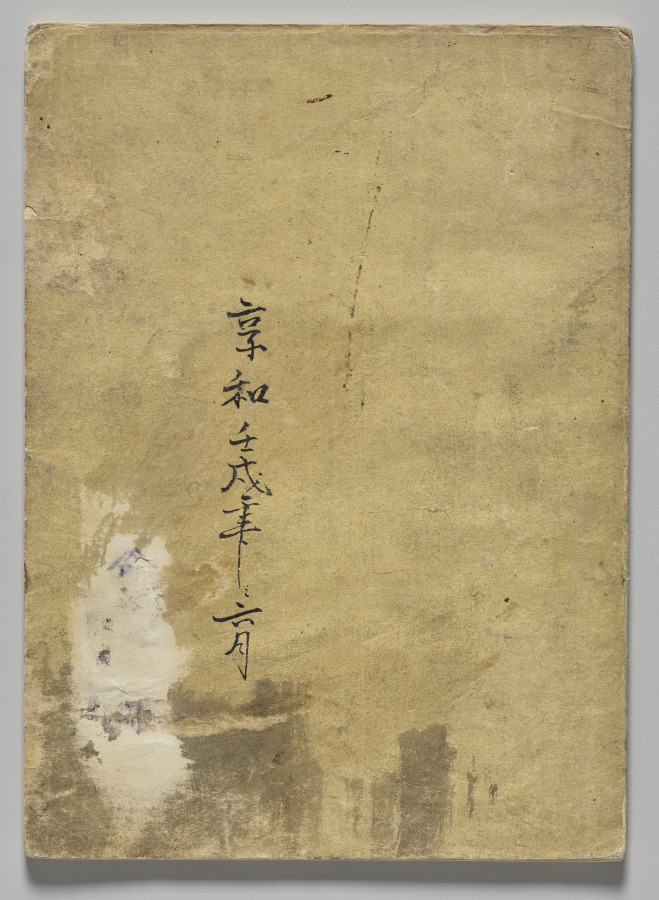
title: The Kōrin Picture Book (Volume 1)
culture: Japan, Edo period (1615–1868)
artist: Nakamura Hōchū (Japanese, d. 1819)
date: 1800s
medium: one of a set of two woodblock printed folding-books; ink and color on paper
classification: Bound Volume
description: Ogata Korin (1658-1716) was one of the most admired artists of Rimpa, or "decorative school painting." These books by the charming later-generation Rimpa artist Hochu record Korin's inventive designs.